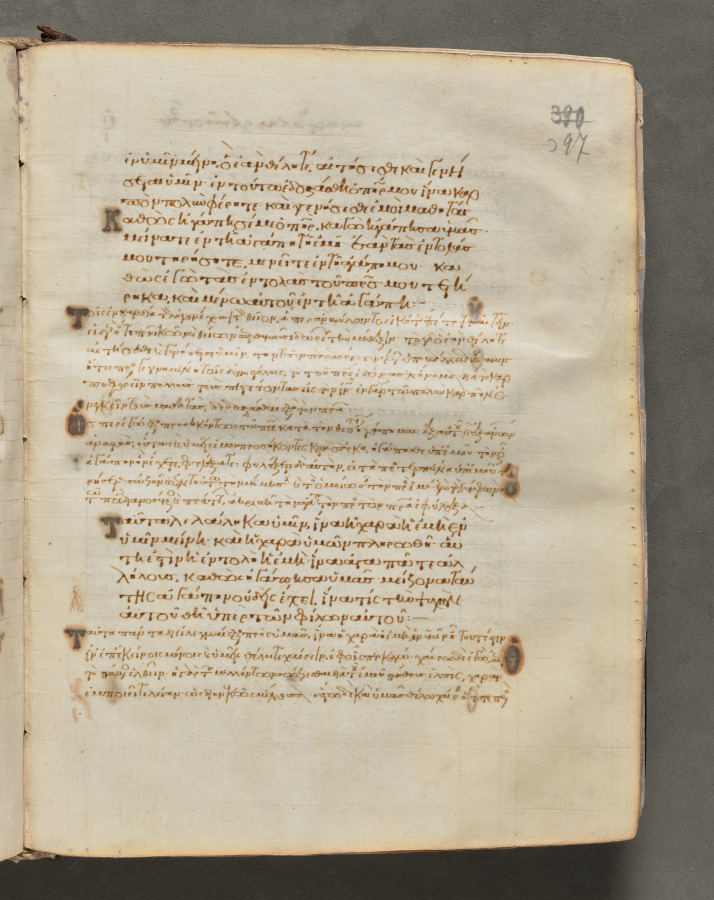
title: Text, folio 397 (recto), from a Gospel Book with Commentaries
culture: Byzantium, Constantinople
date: c. 1000–1100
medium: ink, tempera, and gold on vellum; leather binding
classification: Bound Volume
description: Each of the four gospels in this book opens on a page with brilliantly illuminated borders depicting the author of the text as well as birds—principally peacocks, symbols of the immortality of the soul—and fountains, representing the fountain of life and the salvation of the soul. This volume consists of 428 leaves with texts in Greek. Its level of sophistication suggests that it was probably written and decorated in a monastery in Constantinople.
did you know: Gospel books were carried in procession through Byzantine churches.